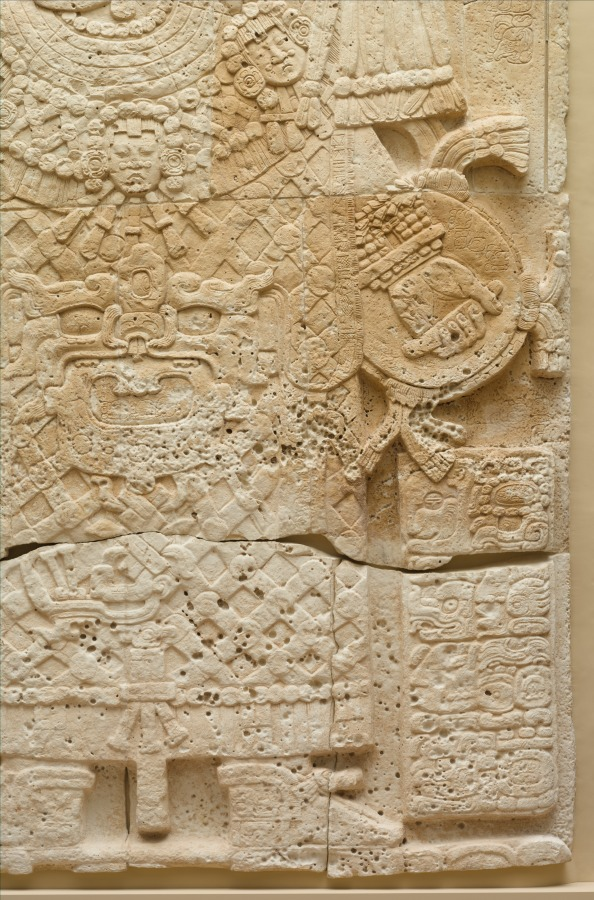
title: Front Face of a Stela (Free-standing Stone with Relief)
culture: Mesoamerica, Guatemala, Department of the Petén, El Perú (also known as Waka'), Maya (250-900), Classic period (200-1000)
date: 692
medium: limestone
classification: Sculpture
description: In stone sculpture, Maya rulers celebrated the milestones of their reigns with flamboyant portraits like this image of a royal woman, created to mark the passage of a twenty-year period known as the k’atun. She originally stood in a plaza next to a portrait of her spouse (see photo), with whom she ruled El Perú-Waka’, a provincial Maya town. A member of the powerful dynasty of a nearby Maya center, she seems to have held higher authority than her husband, serving as a military governor. Her costume reflects her status: the headdress has a fan of green quetzal feathers and her jewelry probably refers to jade-both among the most prized of ancient materials. Jade beads also may form the net over her garment, belted with the head of a fish-like creature. Completing the costume are the scepter and shield she grasps in her hands. The dwarf at her side may be a court attendant. The hieroglyphic text refers to important dynastic dates.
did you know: The powerful Maya queen shown on this stela is known as Lady K’abel.